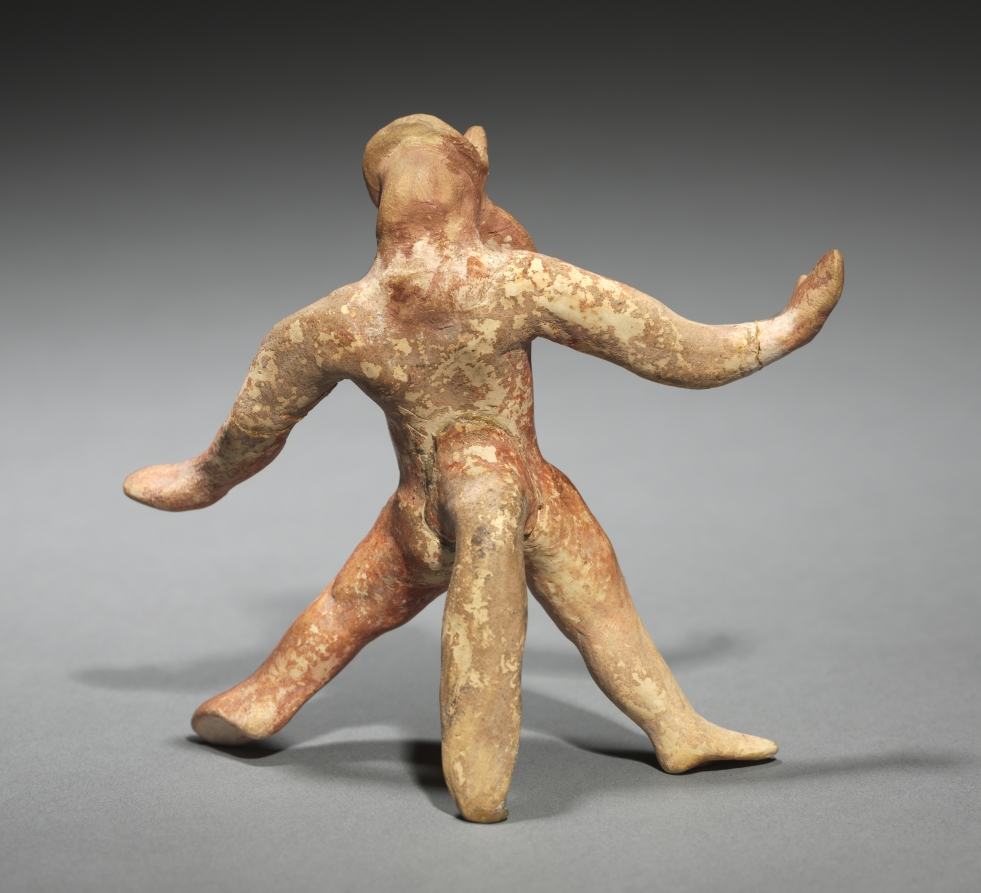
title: Dancing Satyr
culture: Greece, Boeotia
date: 500–475 BCE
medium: painted terracotta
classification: Sculpture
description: Part man and part beast, satyrs were mythical woodland creatures. In art, they were depicted with the ears and tail of a goat or horse, sometimes with hooves, and in a high state of sexual arousal. Satyrs often accompanied Dionysus, the god of wine, in his drinking bouts and other escapades. These three probably once decorated the rim of a large punch-bowl–shaped vessel for serving wine.